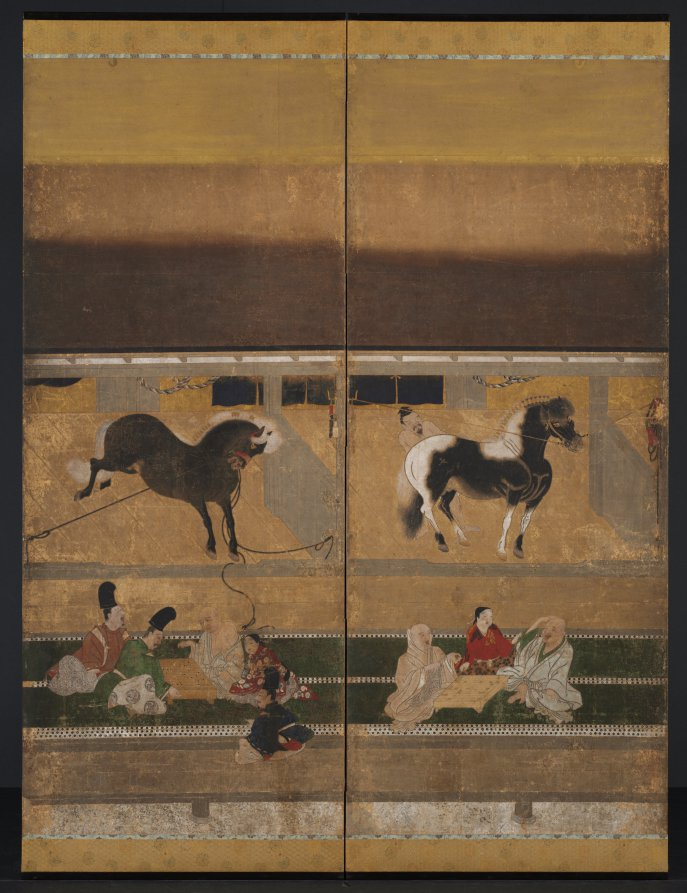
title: Horse Stable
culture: Japan, Muromachi period (1392–1573)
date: early 1500s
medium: One of a pair of six-panel folding screens; ink, color, and gold on paper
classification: Painting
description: Prized horses in stables may be the main theme of the pair of screens to which this screen belongs, but a lot of action is happening on the verandas. Here, people challenge one another at two different board games, go and shōgi. A lively atmosphere develops in the interplay of the dynamic horses and the strategic games.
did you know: Shōgi means "military leader's board game."